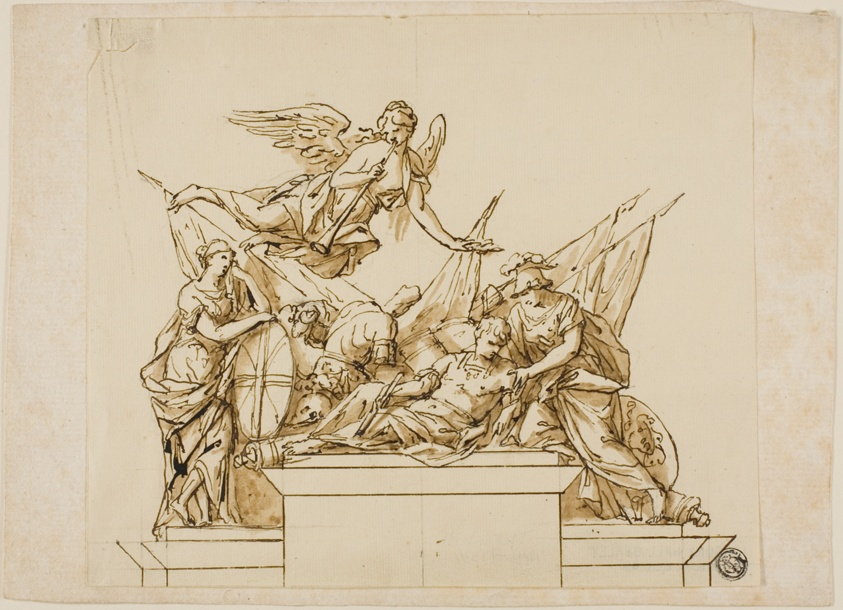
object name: Drawing and Watercolor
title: Unexecuted Design for the Monument to the First Duke of Marlborough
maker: John Michael Rysbrack (Flemish, 1693-1770)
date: c. 1733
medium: Pen and brown ink, with brush and brown wash, over graphite, on cream laid paper, tipped onto ivory laid paper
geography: Flanders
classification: pen and ink drawings; drawings (visual works); prints and drawing